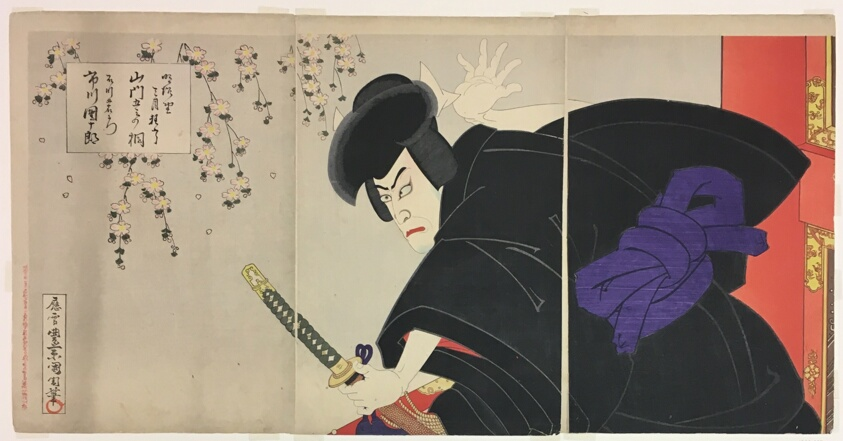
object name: Print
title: Actor Ichikawa Danjuro IX as Ishikawa Goemon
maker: Toyohara Kunichika (Japanese, 1835-1900)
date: 1896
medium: Color woodblock prints; oban triptych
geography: Japan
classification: woodblock print; print; asian art